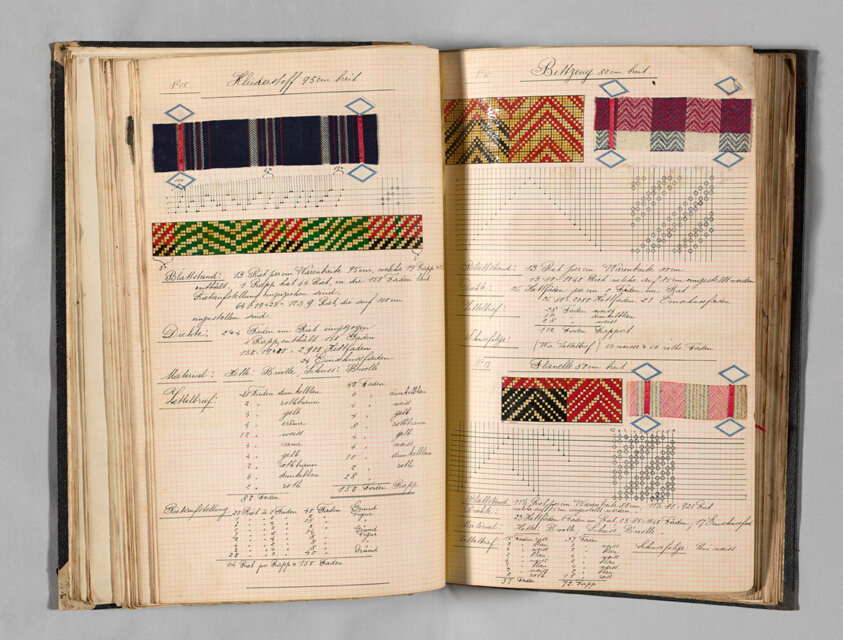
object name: Book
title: Student Notebook Containing Notes, Diagrams and Swatches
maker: Alfred Fehr (Switzerland, 1879-1955)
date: c. 1898–1900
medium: Bound notebook of technical notes and weave samples: fabrics for clothing and mixed goods, ribbed and twill cottons, and jacquard; 176 pages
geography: Germany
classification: book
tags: weaving, diagrams